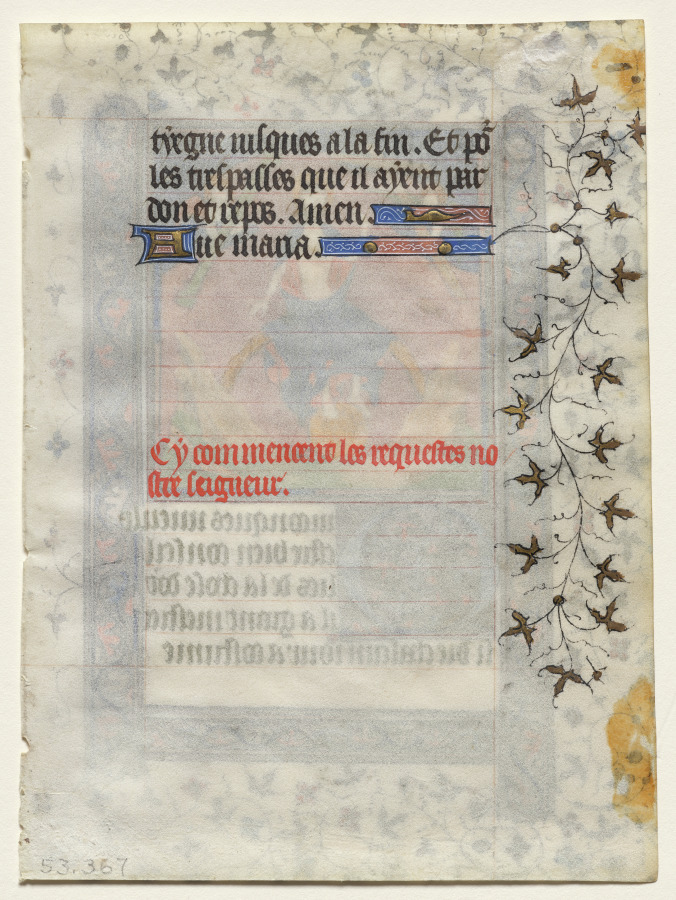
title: Leaf from a Book of Hours: Christ in Judgment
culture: France, Paris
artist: workshop of Boucicaut Master (French, Paris, active about 1410–25)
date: c. 1415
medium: ink, tempera, and gold on vellum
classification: Manuscript